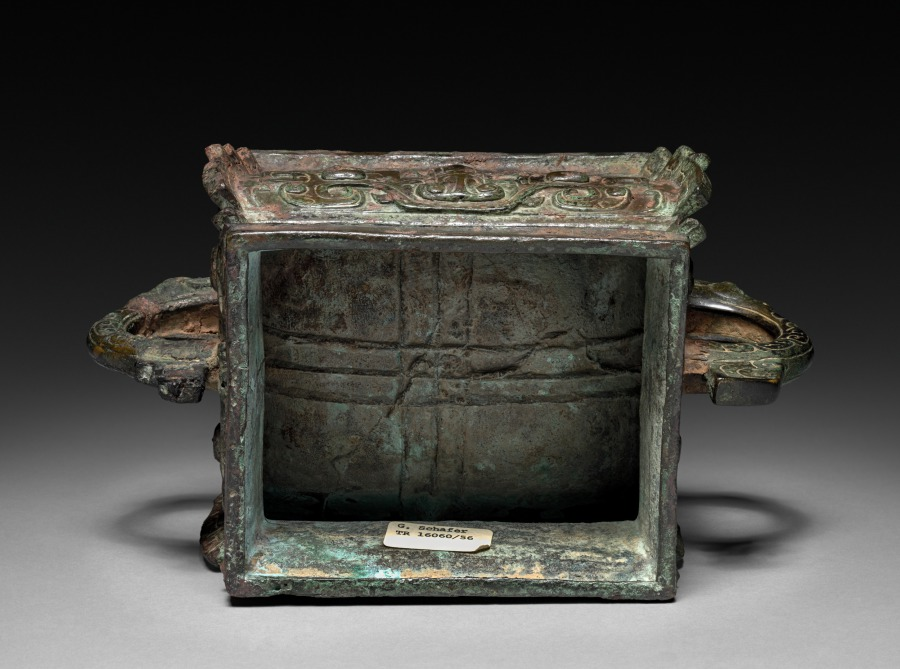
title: Kuei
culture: China, Western Zhou dynasty (c. 1046–771 BCE)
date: 1045–771 BCE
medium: bronze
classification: Metalwork